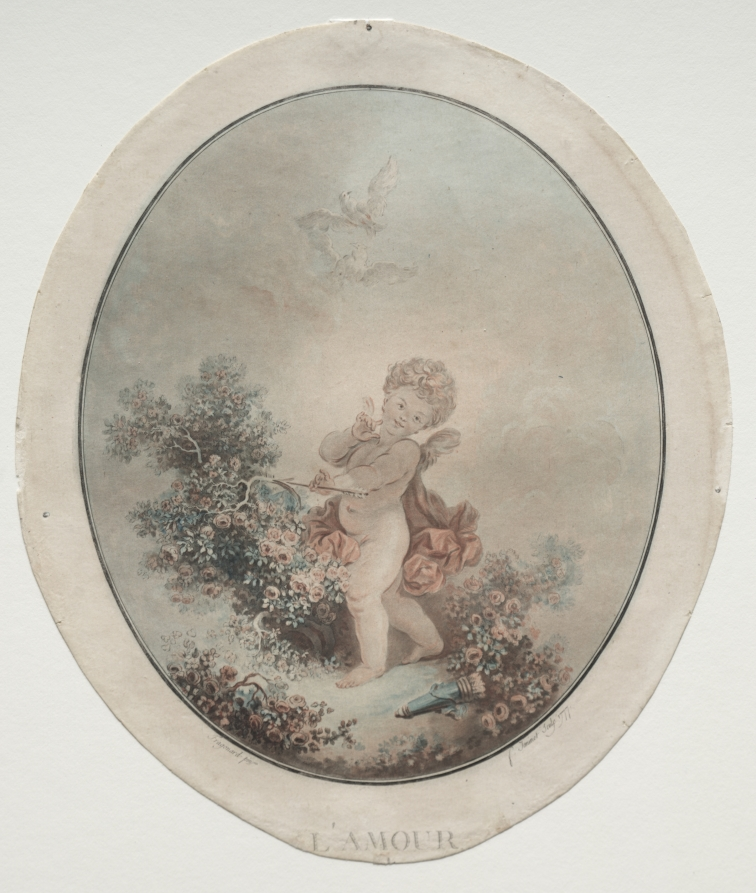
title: Cupid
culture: France, 18th century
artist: Jean François Janinet (French, 1752–1814)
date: 1777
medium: aquatint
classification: Print